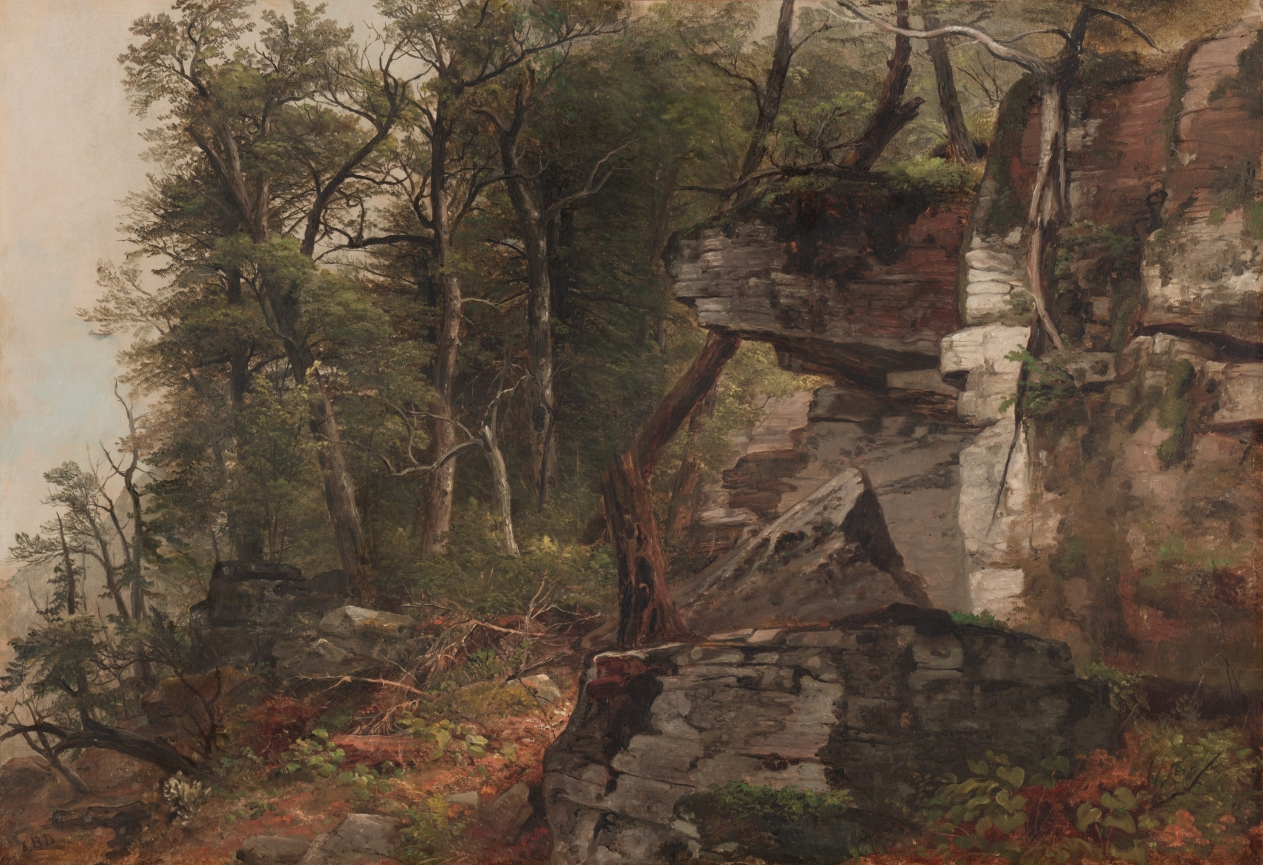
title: Trees on a Rocky Hillside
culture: America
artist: Asher B. Durand (American, 1796–1886)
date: c. 1849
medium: oil on canvas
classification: Painting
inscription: Signed lower left: "ABD"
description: Durand was one of the first American artists to paint outdoors, rather than in the confines of a studio, which was the longstanding tradition. This outdoor oil sketch of a seemingly random corner of the woods offers an intimate view of a rock outcropping amid lush vegetation. Its small-scale, unusually cropped composition contrasts with the sweeping vistas in many other landscapes of the era.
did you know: Before becoming a painter, Durand designed paper currency for the federal government.